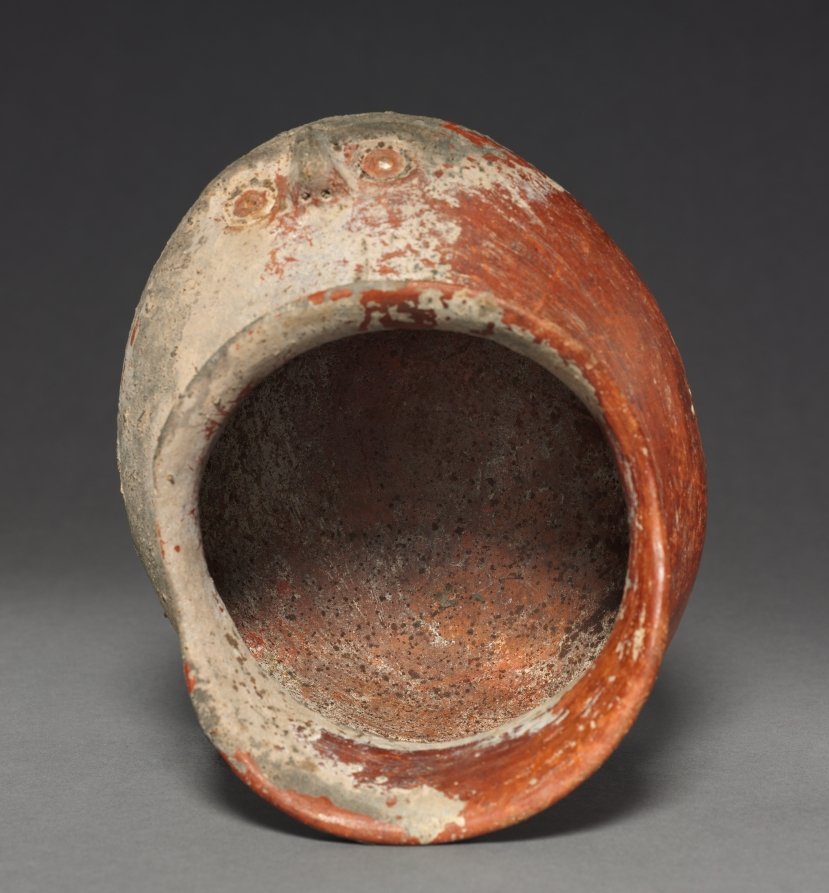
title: Head Effigy Bowl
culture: Mexico, Region of Tilantongo, District of Tlaxiaco, Nayarit style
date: 100 BCE–300 CE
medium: pottery with burnished red slip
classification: Ceramic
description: After about 200 BC, West Mexican chieftains gained in authority, their new status reflected in shaft tombs that shelter not only their remains but also lavish offerings, including sculptural ceramics. Many of the ceramics may refer to the crucial activities of a chief’s life, such as marriage, feasting, and war. The meaning of this unusual bowl—a head whose gaping mouth serves as the aperture—is unknown.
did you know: Diego Rivera and Rufino Tamayo were avid collectors of ancient Nayarit art.